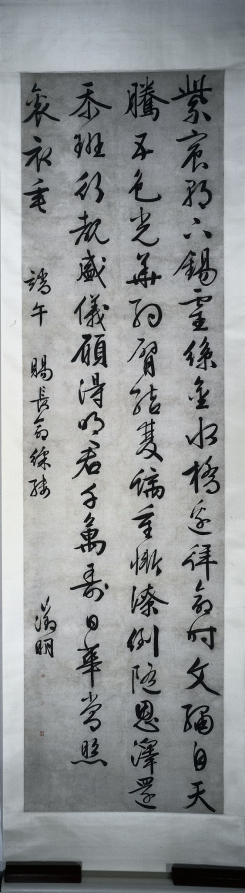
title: Poem on Imperial Gift of an Embroidered Silk: Calligraphy in Running-Standard Script (xingkaishu)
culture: China, Suzhou, Ming dynasty (1368-1644)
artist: Wen Zhengming (Chinese, 1470–1559)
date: c. 1525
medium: Hanging scroll; ink on paper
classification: Calligraphy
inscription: The text of the calligraphy, which is also included in Wen Zhengming's literary compilation, can be translated as follows: From the throne, this exquisite silk was bestowed on me,/ As I expressed my gratitude to His Majesty by the Goldwater Bridge./ This heavenly silk is embroidered with five colors./ Resplendent it is, draping over my arm with [designs of] twin dragons./ Having received such a gift, I [bowed] in shame over my lack of achievements./ Humbly I returned to my rank to observe the grand ceremony./ I wish His Majesty shall live on for myriad years,/ And the sun will always shine upon His trailing robe.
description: A poem by the influential Wen Zhengming from Suzhou in southeastern China expresses Wen’s gratitude to the Jiajing emperor (reigned 1522–67) for a gift of embroidered silk bestowed in appreciation of his commendable service. The elegant, well-composed, and energetically written large characters in deep black ink reflect the handwriting of a distinguished scholar-artist. Works of calligraphy by Wen of this large scale are rare. The poem reads: As I expressed my gratitude to His Majesty by the Goldwater Bridge. This heavenly silk is embroidered with five colors. Resplendent it is, draping over my arm with [designs of] twin dragons. Having received such a gift, I [bowed] in shame over my lack of achievements. Humbly I returned to my rank to observe the grand ceremony. I wish His Majesty shall live on for myriad years, And the sun will always shine upon His trailing robe.